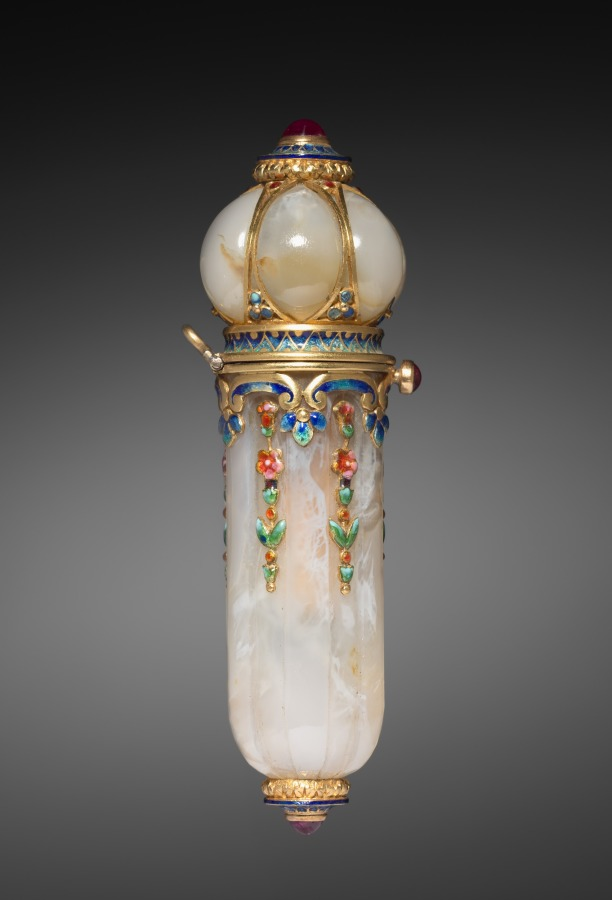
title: Perfume Vial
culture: France, Paris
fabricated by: Tecla Firm (French)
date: c. 1900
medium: agate with enamel, gold, rubies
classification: Miscellaneous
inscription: "Tiffany & Co." engraved at edge of top.